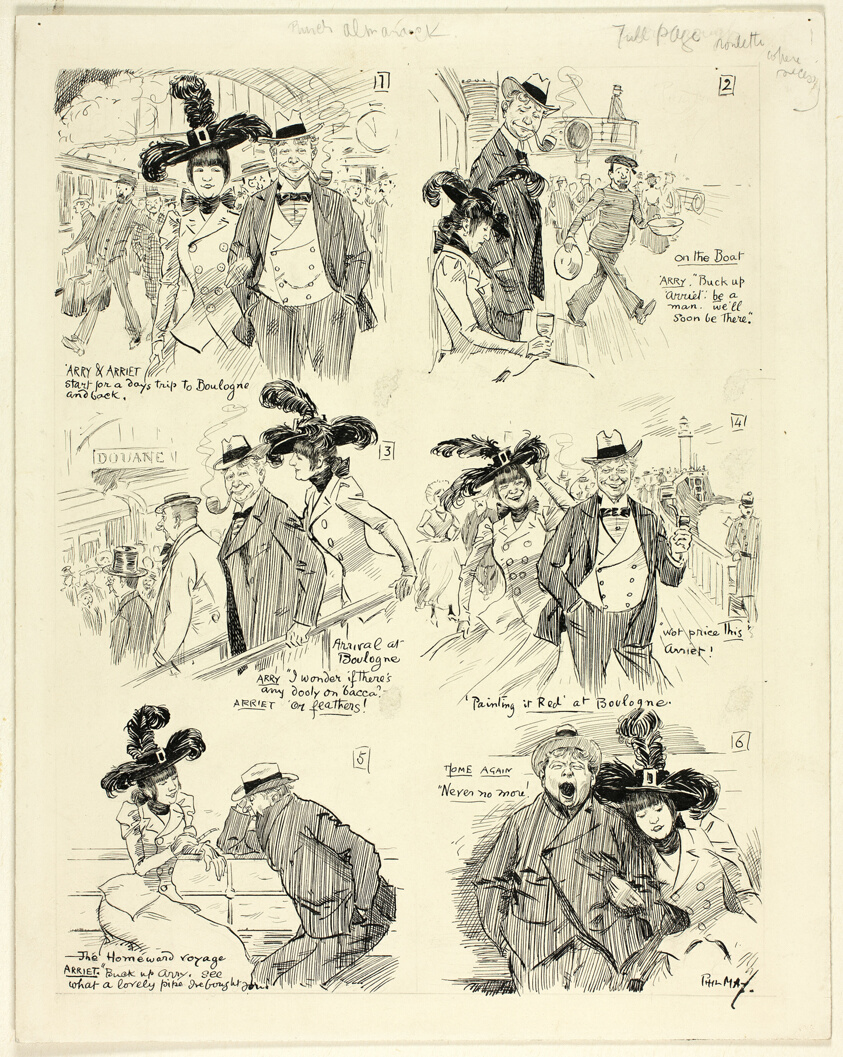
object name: Drawing and Watercolor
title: Arry and Arriet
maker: Philipp William May; English, 1864-1903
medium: Pen and black ink over traces of graphite on cream wove board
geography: England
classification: pen and ink drawings; drawings (visual works); prints and drawing